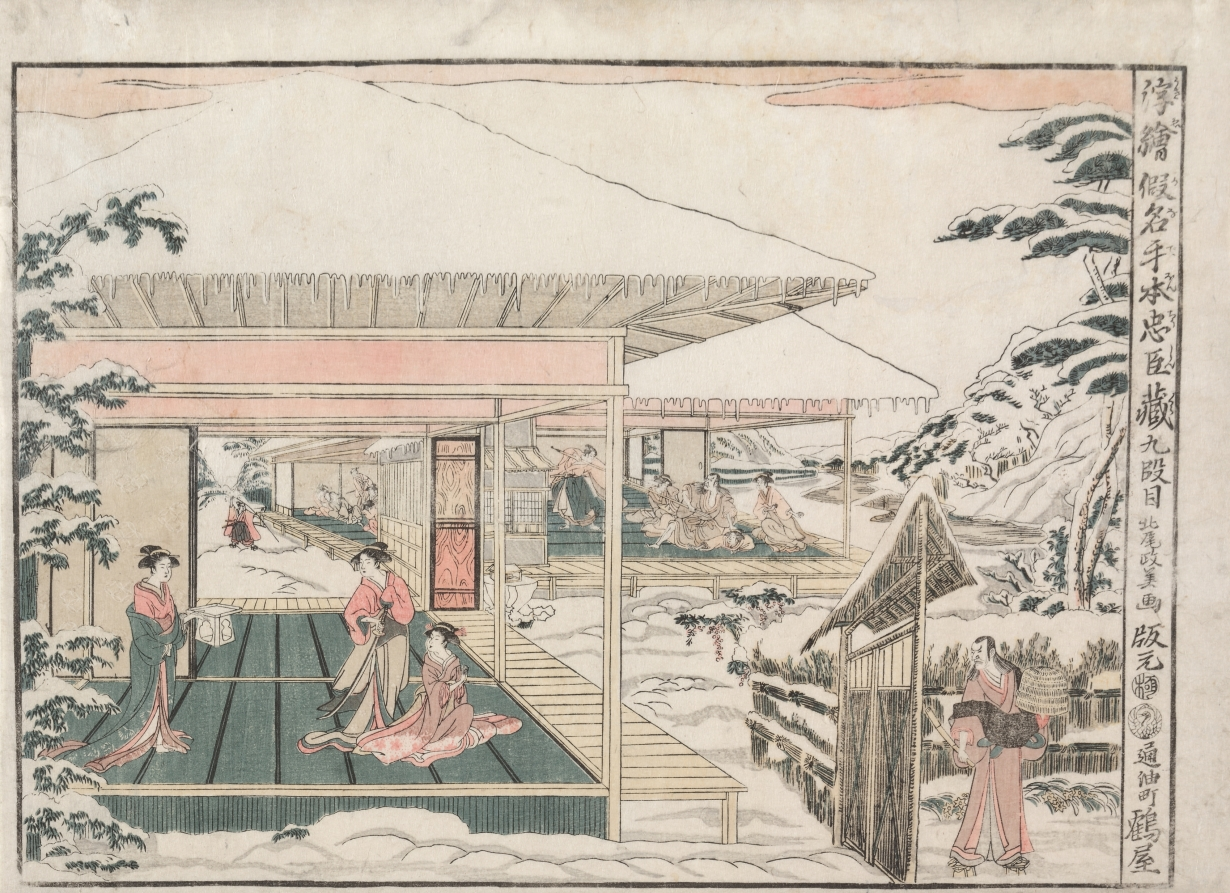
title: Chushingura: Act IX (from the series Perspective Pictures for The Treasure House of Loyalty)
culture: Japan, Edo period (1615–1868)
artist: Kitao Masayoshi (Japanese, 1761–1824)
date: c. 1790s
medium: color woodblock print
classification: Print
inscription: Signature: Kitao Masayoshi ga Publisher: Tsuruya Kiemon (hammoto Toriaburacho Tsuruya, emblem) Censorship Seal: kiwame